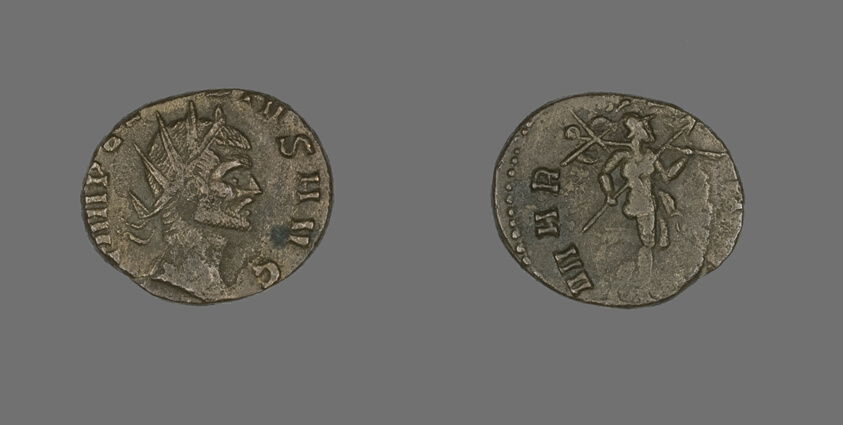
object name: Coin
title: Coin Portraying an Emperor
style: roman (ancient, style or period), ancient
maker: Roman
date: mid–3rd century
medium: Bronze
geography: Roman Empire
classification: coin; ancient art